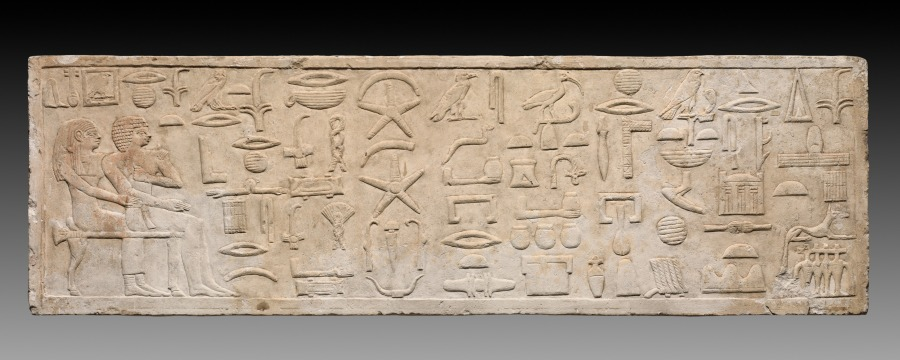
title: Lintel of Enseperi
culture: Egypt, Giza, western cemetery, excavations of Montague Ballard, 1901–2, Old Kingdom (2647–2124 BCE), Dynasty 5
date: 2454–2311 BCE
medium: limestone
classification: Sculpture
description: Carved in raised relief, the inscription on this lintel is arranged in vertical columns, with the signs facing right. The tomb owner and his wife, labeled above as "the king's acquaintance, Neferiuhathor(?)" are seated together at the far left on a long chair or couch with bull's legs and a cushion but no back rest.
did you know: Neferiuhathor appears to place her left hand on Endeperi's shoulder but the chair overlapping her legs shows that she is seated at his left.